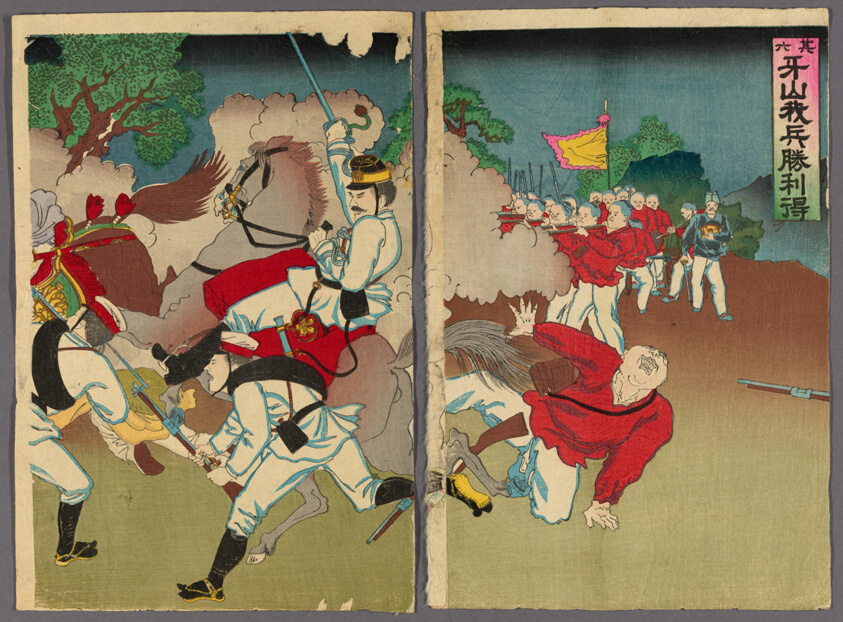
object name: Print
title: No. 6: Our Troops Gain Victory at Asan (Sono roku, Gazan waga hei shori o eru)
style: Japanese (culture or style)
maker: Unknown Artist; Japanese, active 1890s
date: 1894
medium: Color woodblock print; two sheets of oban triptych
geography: Japan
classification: woodblock print; print